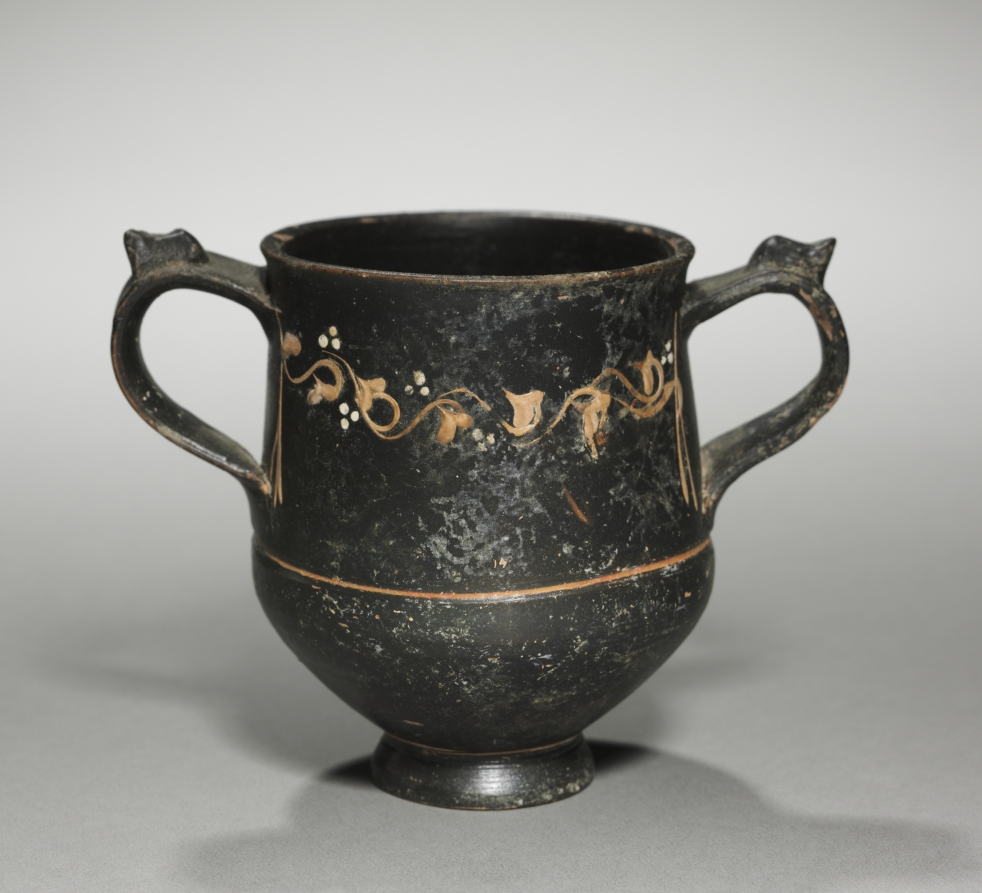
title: Black-Gloss Kantharos (Drinking Cup)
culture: Greek, Attic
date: c. 300–275 BCE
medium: ceramic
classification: Ceramic